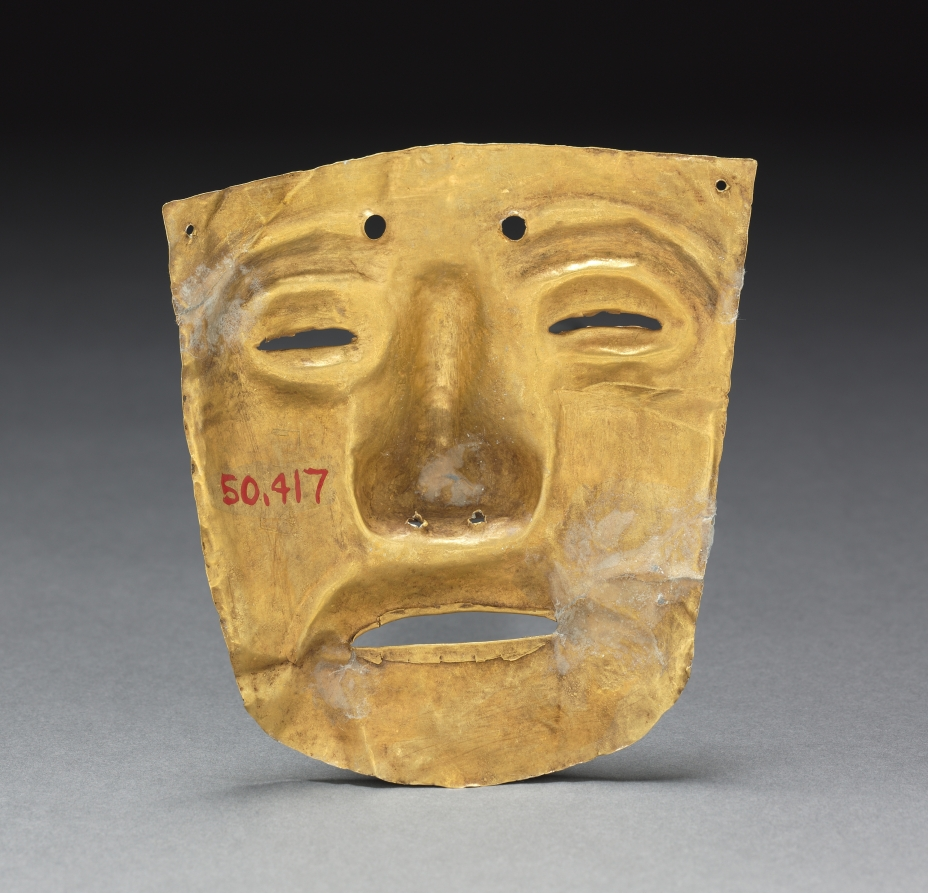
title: Mask Ornament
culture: Southern Costa Rica, (Rio Grande de Térraba, Diquís Region), Diquís Style, 8th-16th Century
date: c. 700–1550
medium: hammered and cut gold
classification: Metalwork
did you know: Panning for gold was viewed as a sacred activity among the ancient inhabitants of Costa Rica and Panama.